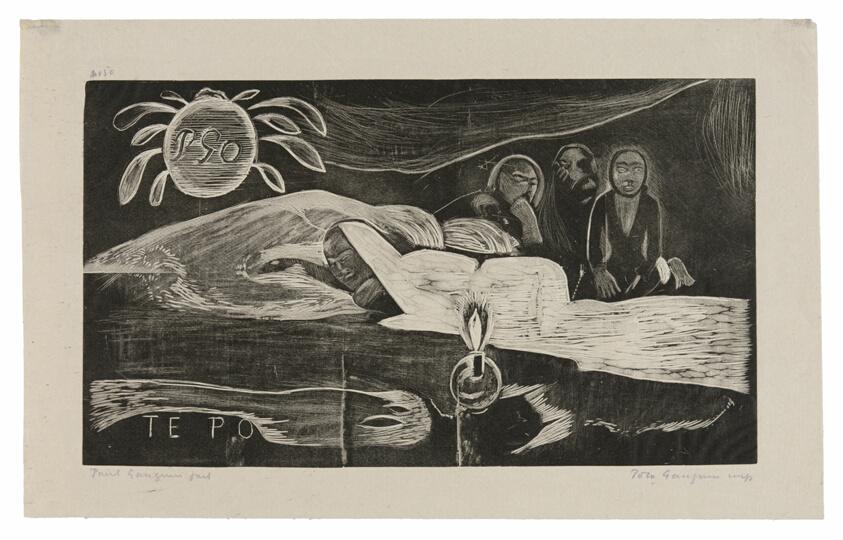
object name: Print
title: Te po (The Night), from the Noa Noa Suite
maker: Paul Gauguin (French, 1848-1903); printed by Pola Gauguin (Danish, born France, 1883-1961); published by Christian Cato, Copenhagen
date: 1893–94, printed and published 1921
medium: Wood-block print in black ink on grayish-ivory China paper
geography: France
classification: woodcut; print; prints and drawing